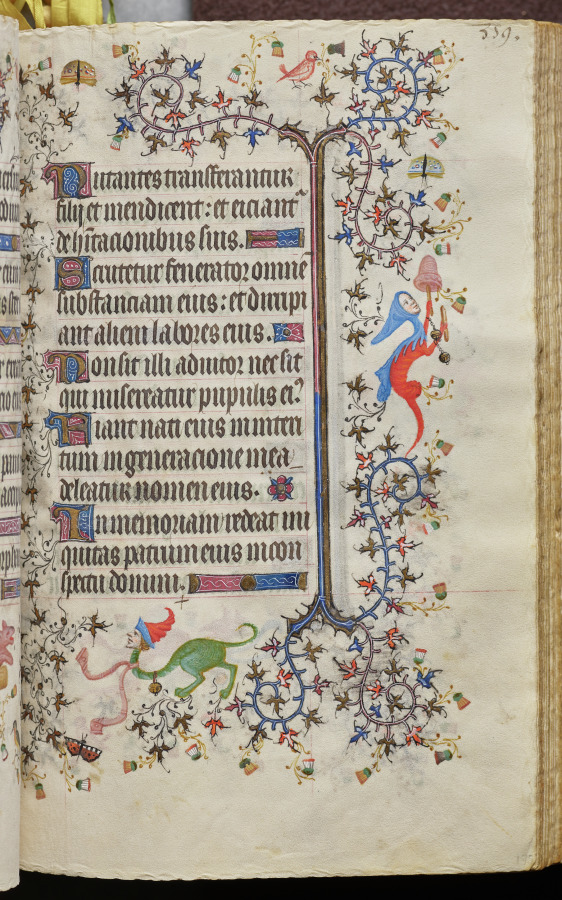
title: Hours of Charles the Noble, King of Navarre (1361-1425): fol. 175r, Text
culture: France, Paris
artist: Master of the Brussels Initials and Associates (French)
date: c. 1405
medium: ink, tempera, and gold on vellum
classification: Bound Volume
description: This precious volume was obviously highly prized by its owner, the French-born King of Navarre, who had his coat of arms painted on no less than twenty folios. Rather than directly commissioning this manuscript from a specific workshop, it seems that Charles the Noble acquired his book of hours -- perhaps ready-made for the luxury market -- while on a trip to Paris in 1404-05. A collaborative effort, six painting styles are evidenced within the pages of this codex, those of two Italians, two Frenchmen, and two Netherlanders. The painter who was responsible for the planning and decoration of the book, and who produced seventeen of the large miniatures, was a Bolognese artist known as the Master of the Brussels Initials. His principal assistant, responsible for most of the borders, was a Florentine who signed his name "Zecho" da Firenze on folio 208 verso.